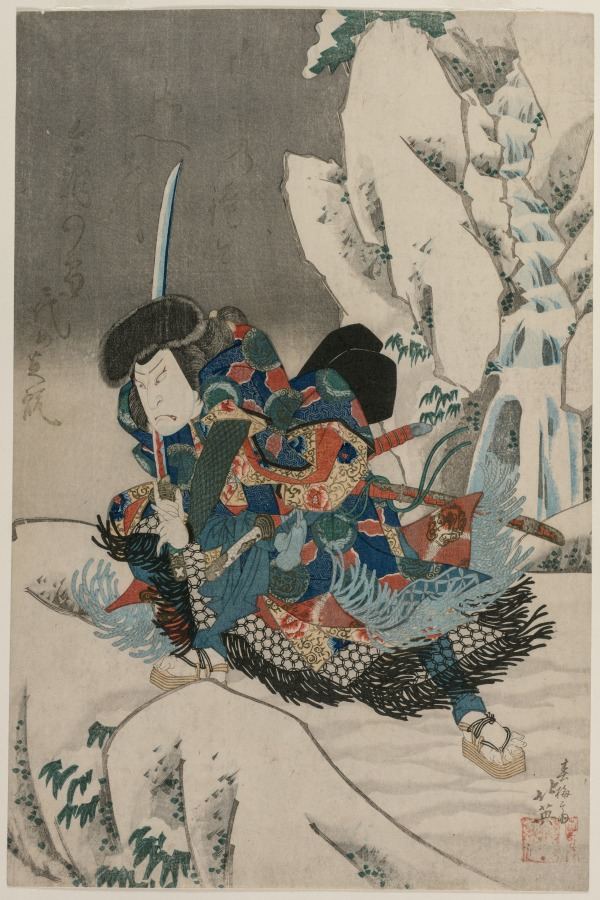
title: Nakamura Utaemon IV as a Warrior Standing in the Snow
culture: Japan, Edo period (1615–1868)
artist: Shunbaisai Hokuei (Japanese, d. 1837)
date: c. 1835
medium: color woodblock print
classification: Print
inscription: signature: Shumbaisai Hokuei seals: Fumoto no yuki